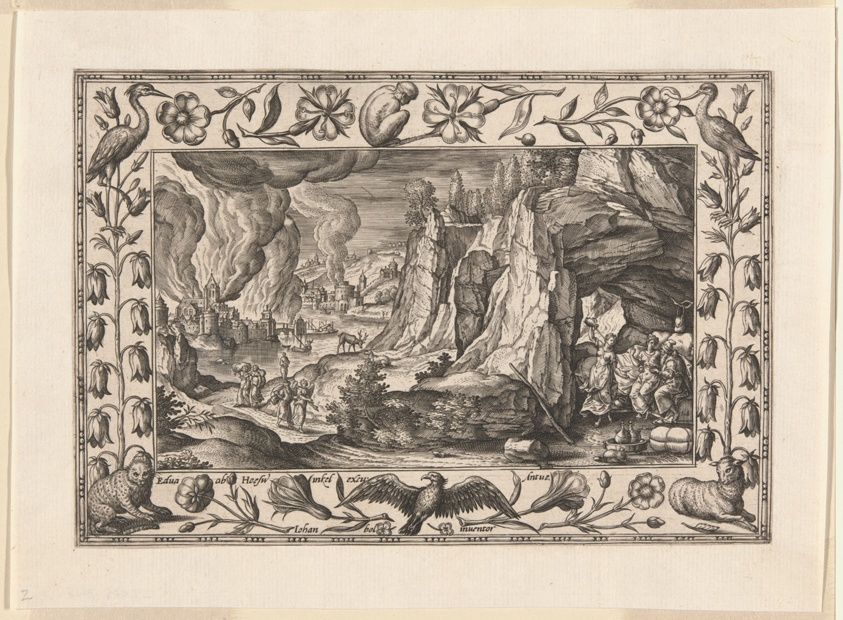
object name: Print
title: Lot and His Daughters, from Landscapes with Old and New Testament Scenes and Hunting Scenes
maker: Adriaen Collaert (Flemish, c. 1560–1618); after Hans Bol (Flemish, 1535–1593); published by Anna van Hoeswinckel (Flemish)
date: 1584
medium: Engraving in black on cream laid paper, laid down on cream laid paper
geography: Flanders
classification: engraving; paper; print; prints and drawing